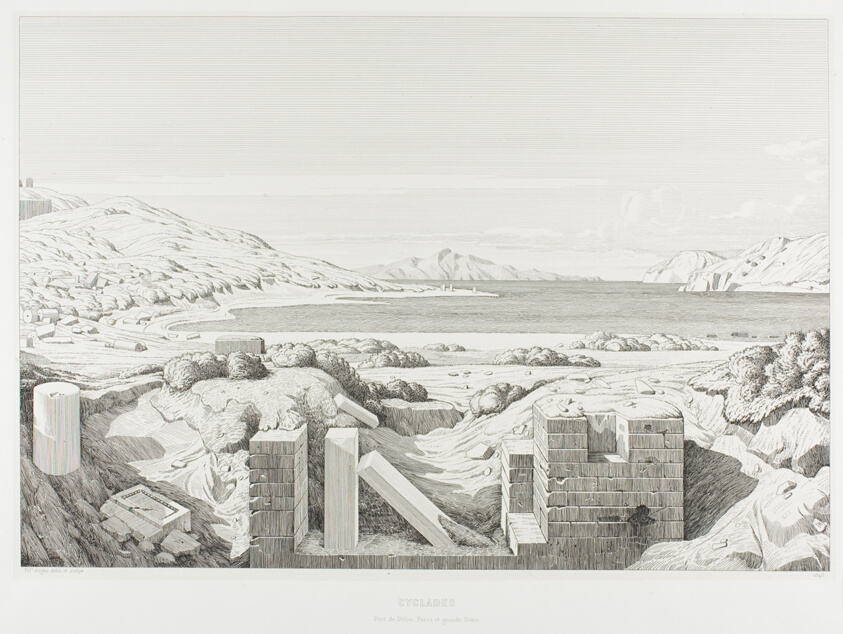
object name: Print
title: View of Corinth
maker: Théodore Caruelle d'Aligny; French, 1798-1871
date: 1845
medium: Etching on ivory China paper, laid down on white wove paper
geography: France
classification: etching; print; prints and drawing